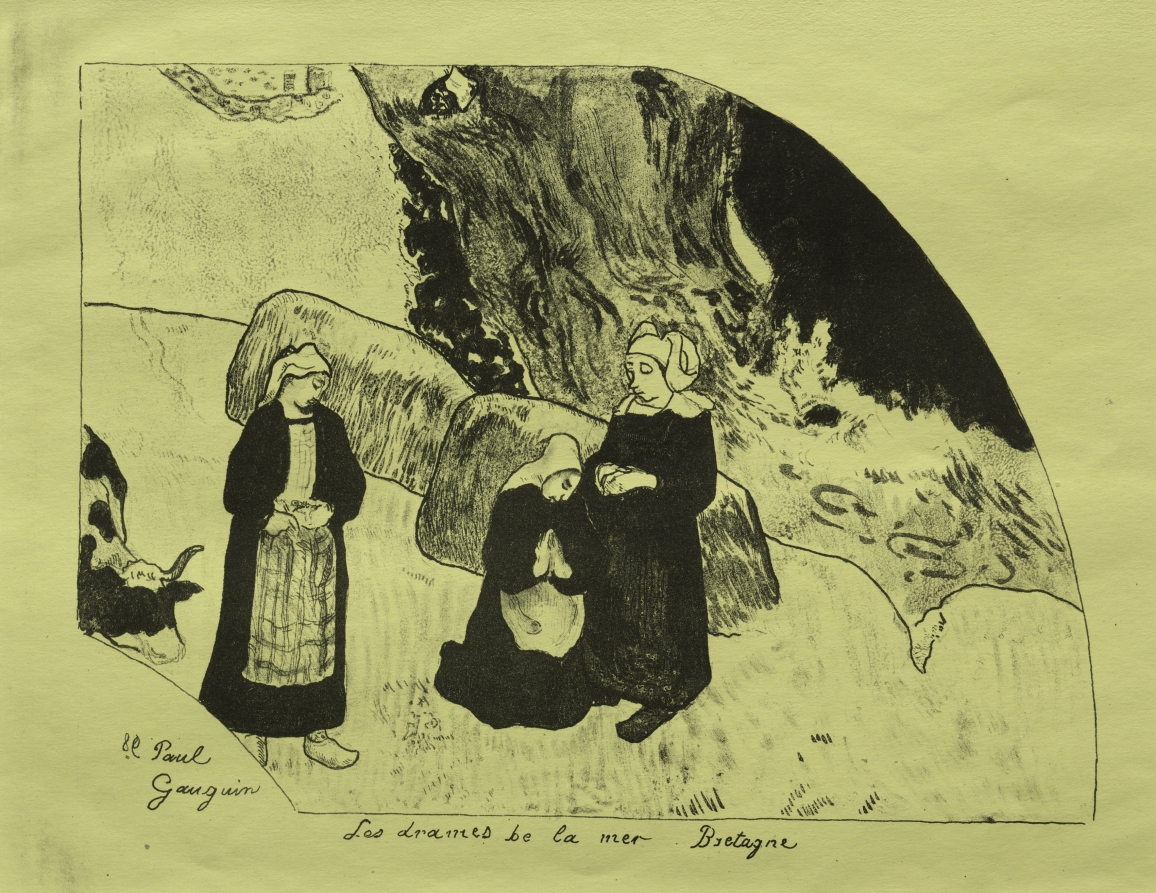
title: Volpini Suite: Dramas of the Sea: Brittany (Les Drames de la Mer, Bretagne)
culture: France, 19th century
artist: Paul Gauguin (French, 1848–1903)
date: 1889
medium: zincograph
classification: Print